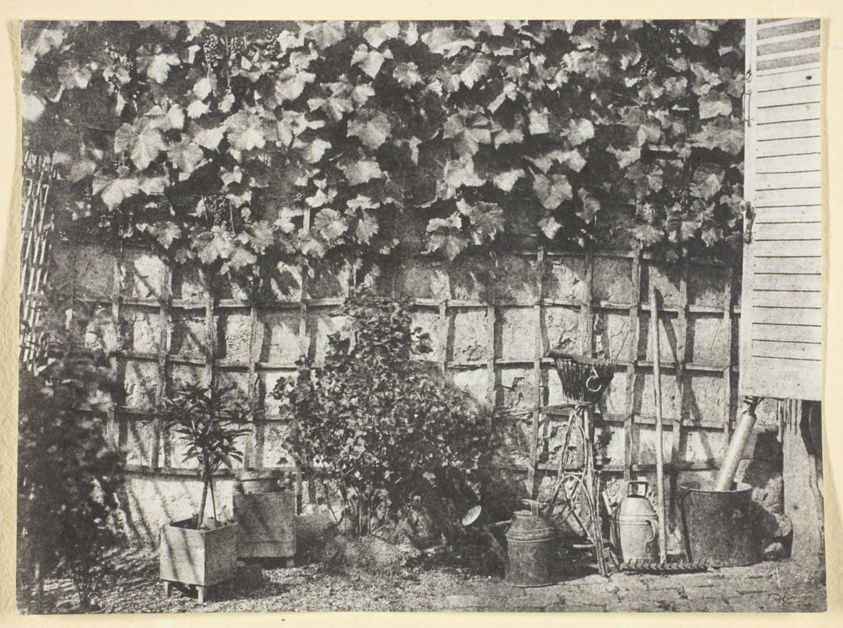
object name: Photograph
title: La Treille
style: 19th century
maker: Hippolyte Bayard (French, 1801–1887)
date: 1847, printed 1965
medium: Gelatin silver print, No. 5 from the portfolio "Bayard: XXV Calotypes, 1842-1850" (1965)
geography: France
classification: photographic process; photography; photograph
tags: Collected by Hugh Edwards